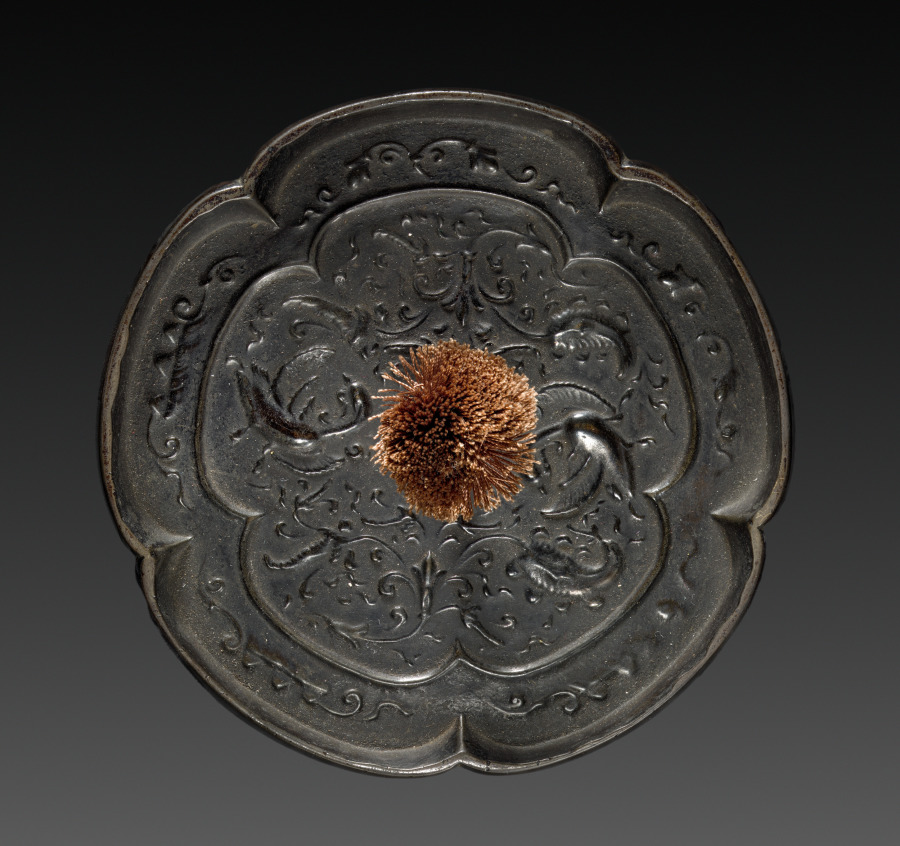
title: Mirror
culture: Japan, Heian period (794–1185)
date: 794–1185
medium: bronze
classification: Metalwork